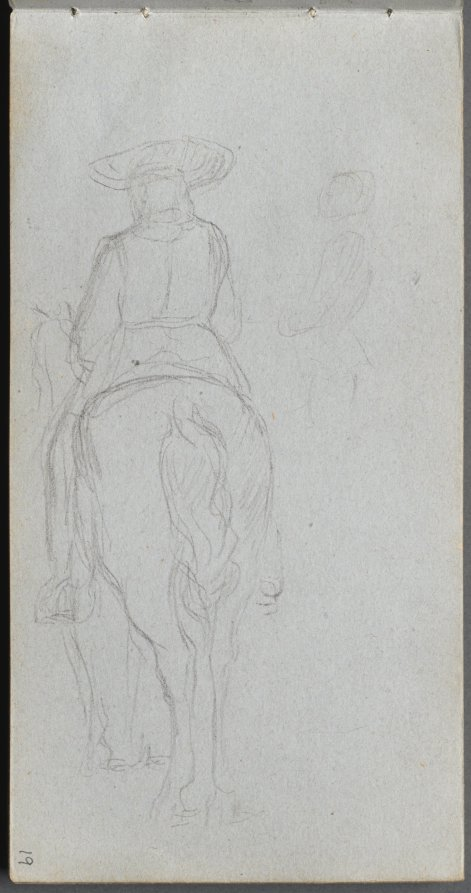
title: Sketchbook, page 19: Study of a Figure on Horseback seen from behind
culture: France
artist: Ernest Meissonier (French, 1815–1891)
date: c. 1860s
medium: graphite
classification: Bound Volume